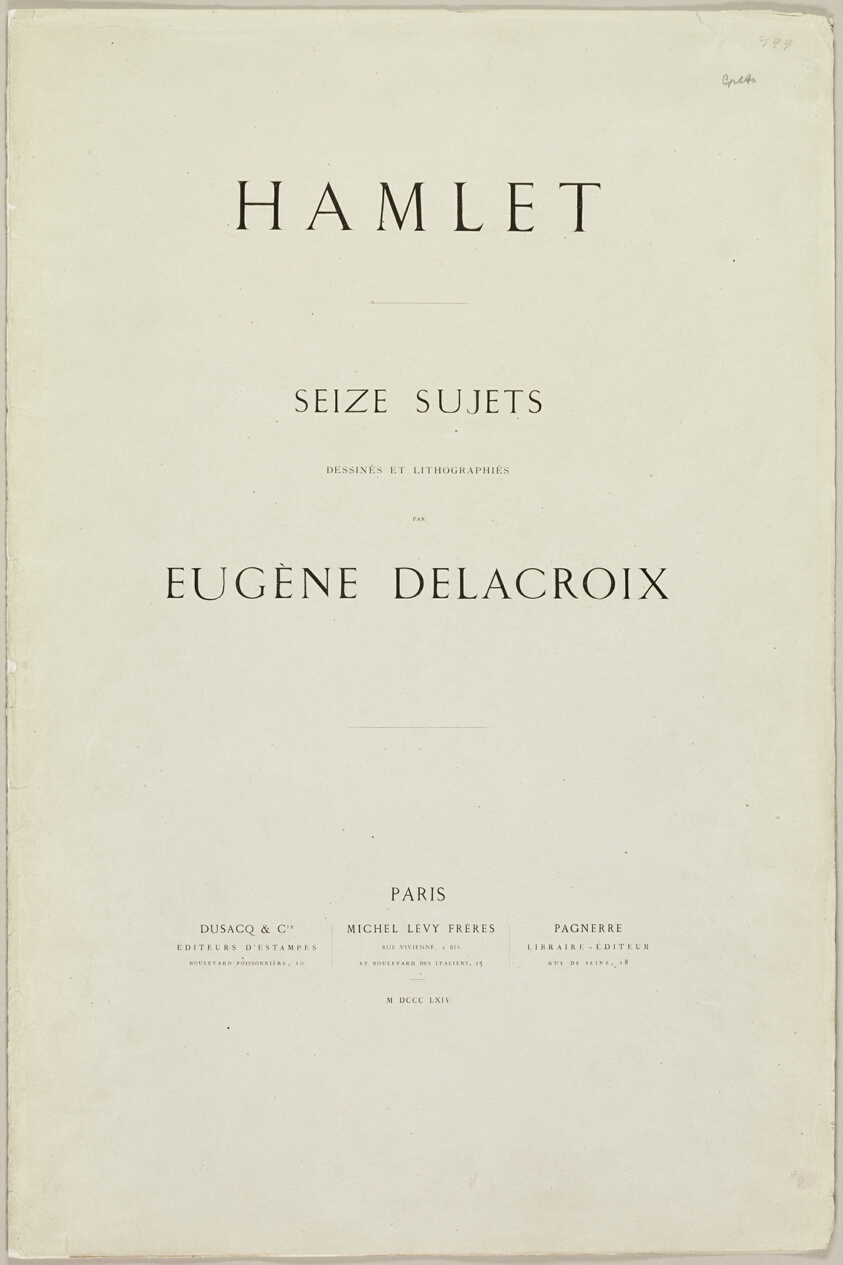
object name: Print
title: Hamlet — Laertes in Ophelia's Grave, title page and table of contents from Hamlet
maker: Eugène Delacroix (French, 1798-1863)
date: 1843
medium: Bi-fold cover on blue wove paper with two white wove insert sheets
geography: France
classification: lithograph; print; prints and drawing